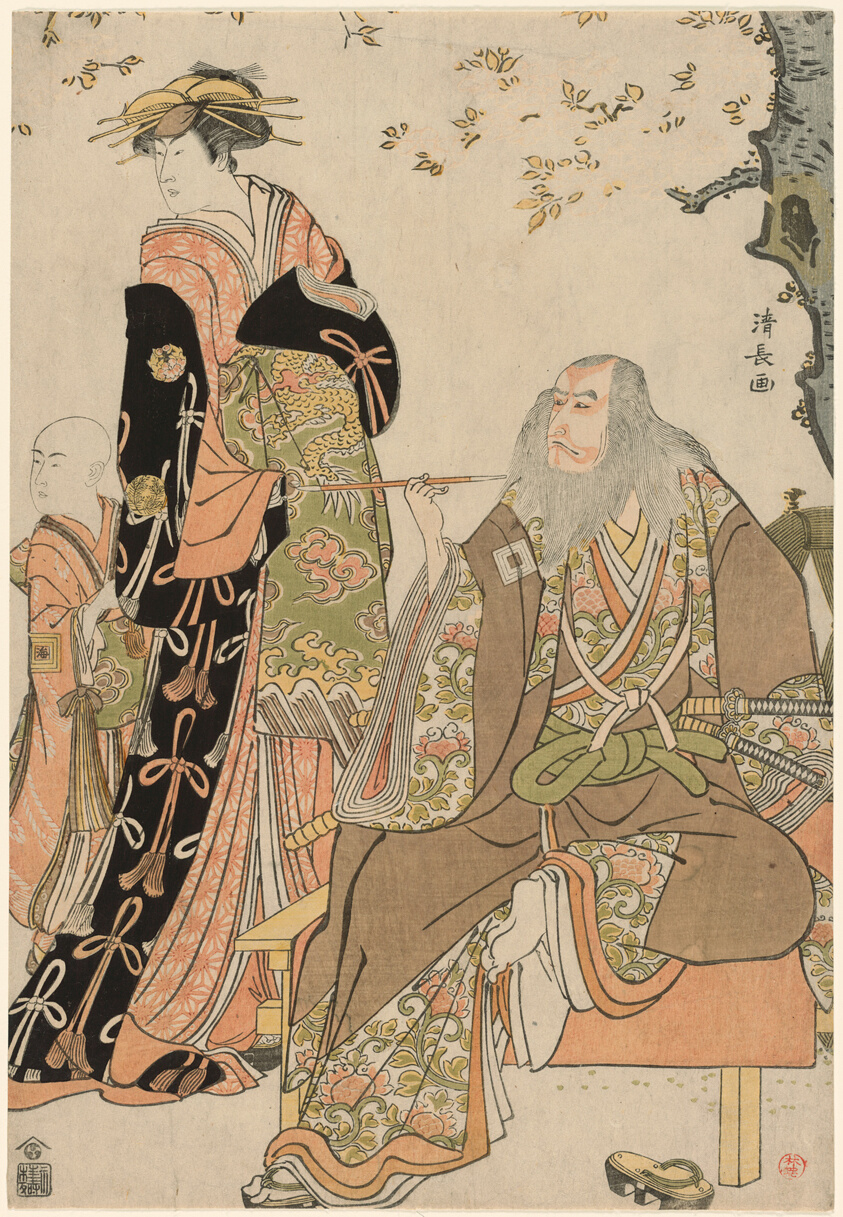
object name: Print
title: The Actors Ichikawa Danjuro V as Hige no Ikyu, Nakamura Riko as Agemaki, and Ichikawa Ebizo as Agemaki's attendant in the play "Sukeroku Yukari no Edozakura" at the Nakamura Theater in the third month, 1784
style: Japanese (culture or style)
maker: Torii Kiyonaga (Japanese, 1752-1815)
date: 1784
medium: Color woodblock print; right sheet of oban diptych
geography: Japan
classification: woodblock print; print; asian art